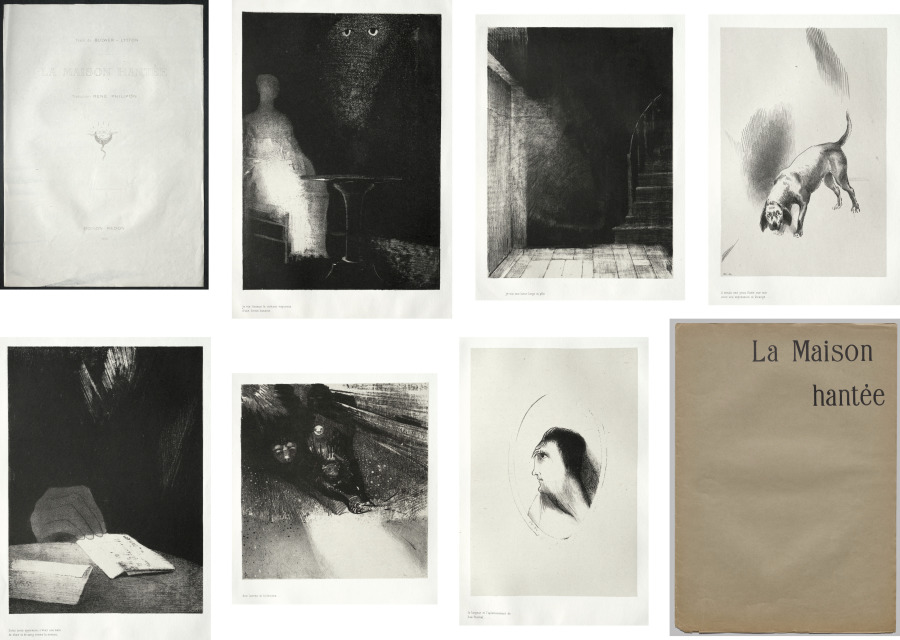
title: The Haunted House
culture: France, late 19th Century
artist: Odilon Redon (French, 1840–1916)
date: 1896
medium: six lithographs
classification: Print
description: Odilon Redon was a voracious reader of contemporary literature, and such texts often influenced his art. This series was inspired by The Haunted and the Haunters, an 1859 novel by British writer Edward Bulwer-Lytton. Redon’s prints capture the book’s mysterious tone and emphasis on the supernatural through vague but evocative imagery that sometimes borders on abstraction. By this time a seasoned expert in lithography, the artist collaborated with master printer Auguste Clot. Their combined technical skills allowed for the rich tonal variation seen here, made by turning Redon’s lithographic crayon on its side, layering various marks, and even scratching directly into the surface of his stone.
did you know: One of Redon's greatest patrons, the occultist René Philipon, commissioned this portfolio as a supplement for his French translation of Bulwer-Lytton's The Haunted and the Haunters.